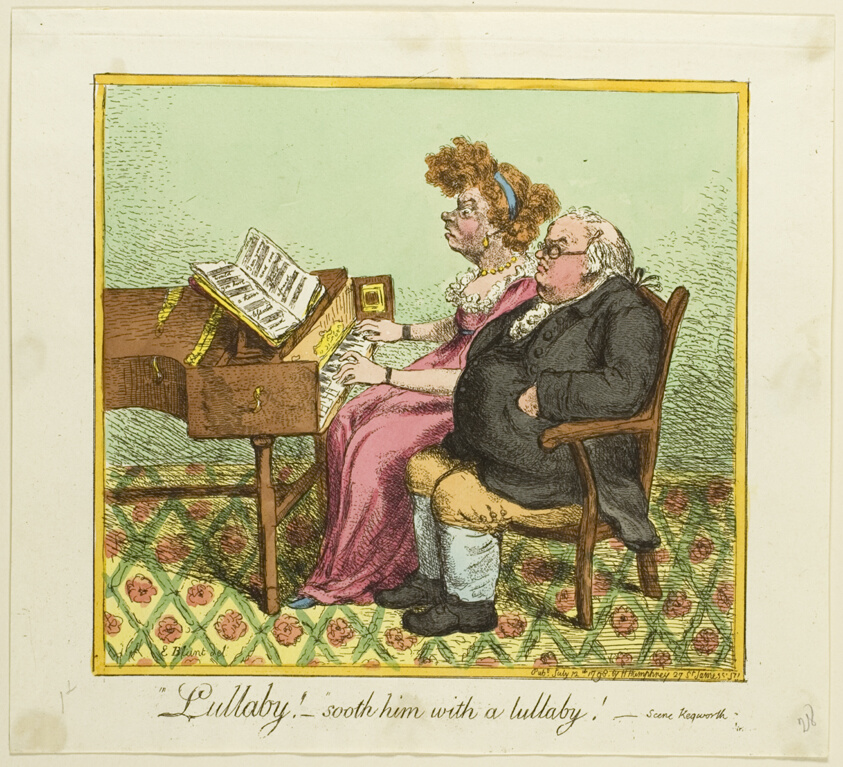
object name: Print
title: Lullaby! Sooth him with a Lullaby!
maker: James Gillray (English, 1756-1815); published by Hannah Humphrey (English, c. 1745-1818)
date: published July 12, 1798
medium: Hand-colored etching on paper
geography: England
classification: etching; print; prints and drawing